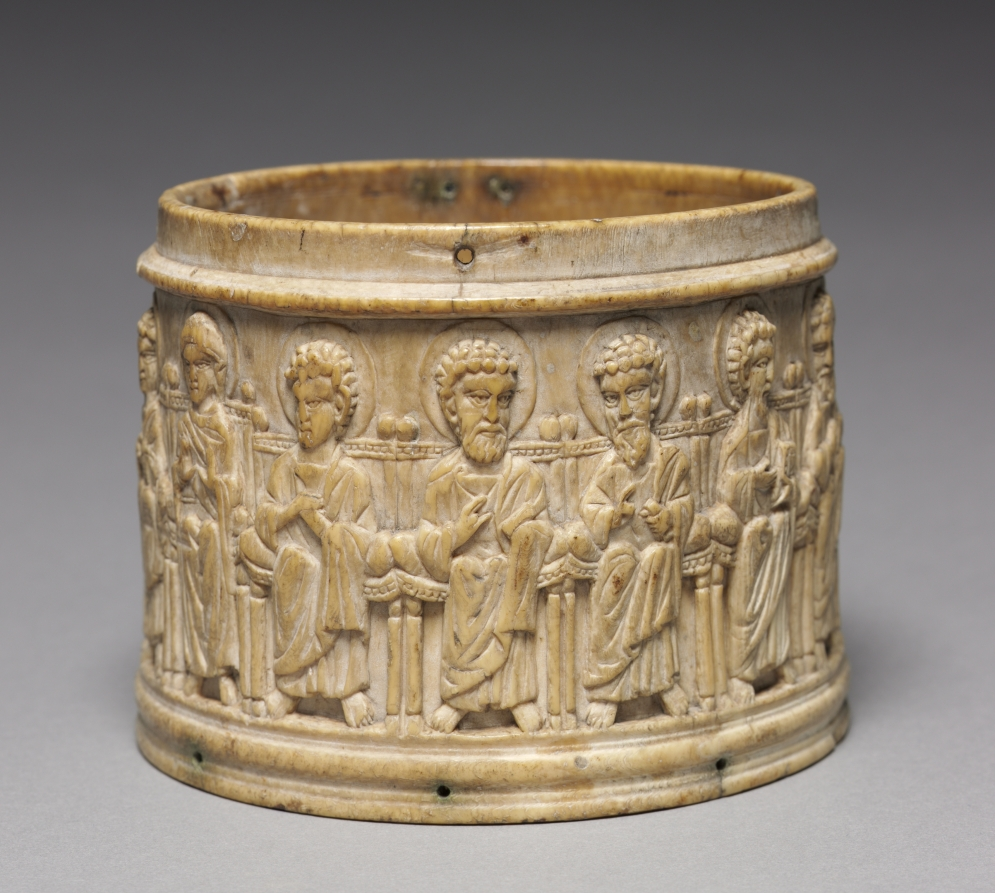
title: The "Apostles" Pyx (Box)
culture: Byzantium, Constantinople, middle Byzantine period, 10th-11th century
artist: probably by Triptych Group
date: c. 980–1010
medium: ivory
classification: Ivory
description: This pyx shows Christ as Pantokrator (Ruler of the World), the Apostles, and the Virgin as a continuous frieze of figures seated in high-backed chairs with cushions. The tapered lip of the body of the pyx was intended to dovetail into the missing lid. Because of its style, the box is thought to be from a workshop of ivory carvers called "The Triptych Group" active in Constantinople between about 950 and 1010. This is the only known pyx to survive from the Middle Byzantine period (about ad 843-1204).